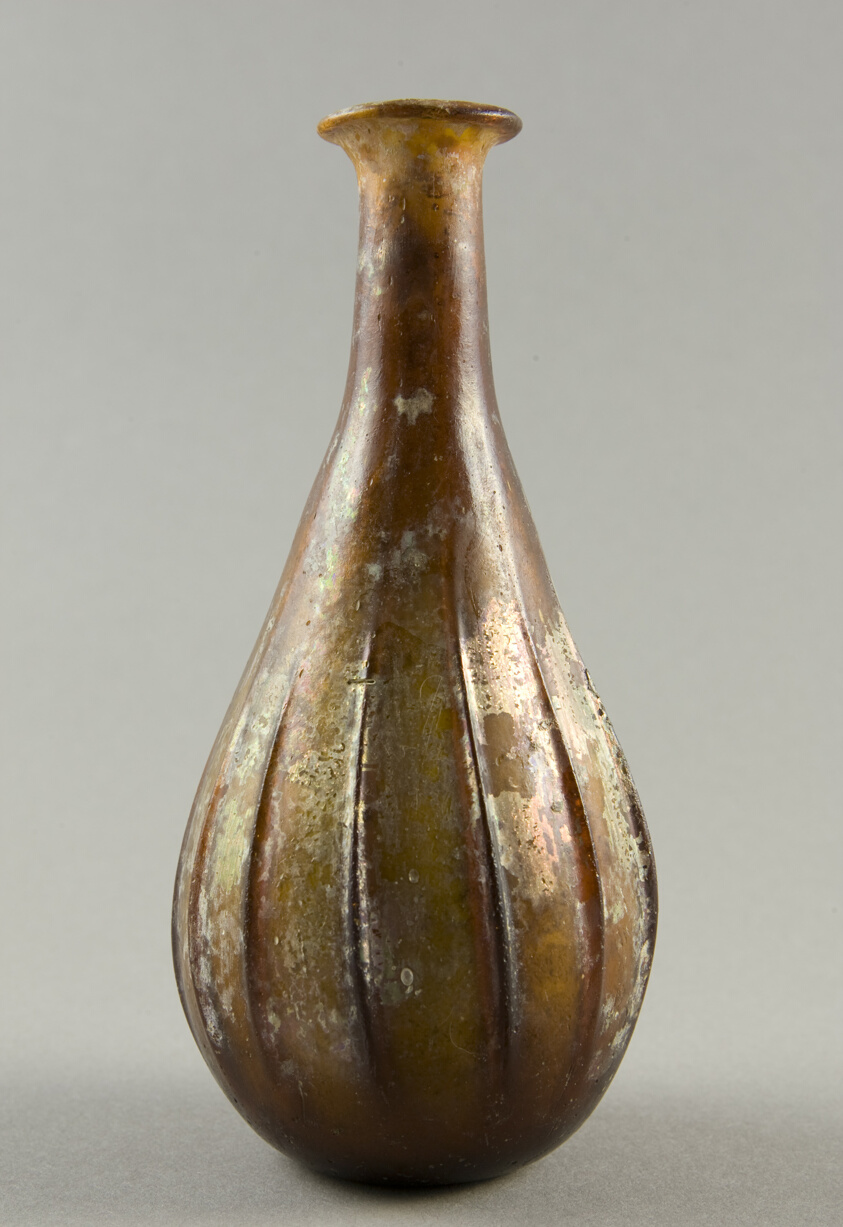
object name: Vessel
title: Bottle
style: syrian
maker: Roman, Levant or Syria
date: 2nd-3rd century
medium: Glass, blown technique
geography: Syria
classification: bottle; glass; vessel; ancient art